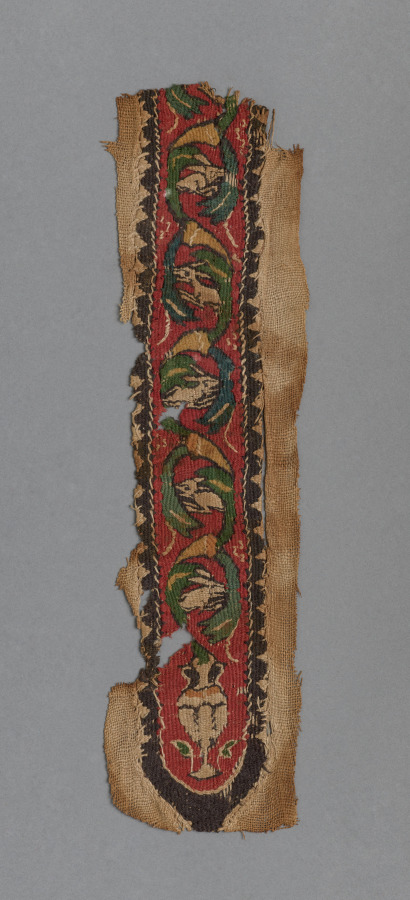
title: Fragment from a Tunic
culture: Egypt, 6th - 16th century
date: 500s - 1500s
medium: tabby weave with inwoven tapestry ornament, linen and wool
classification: Textile